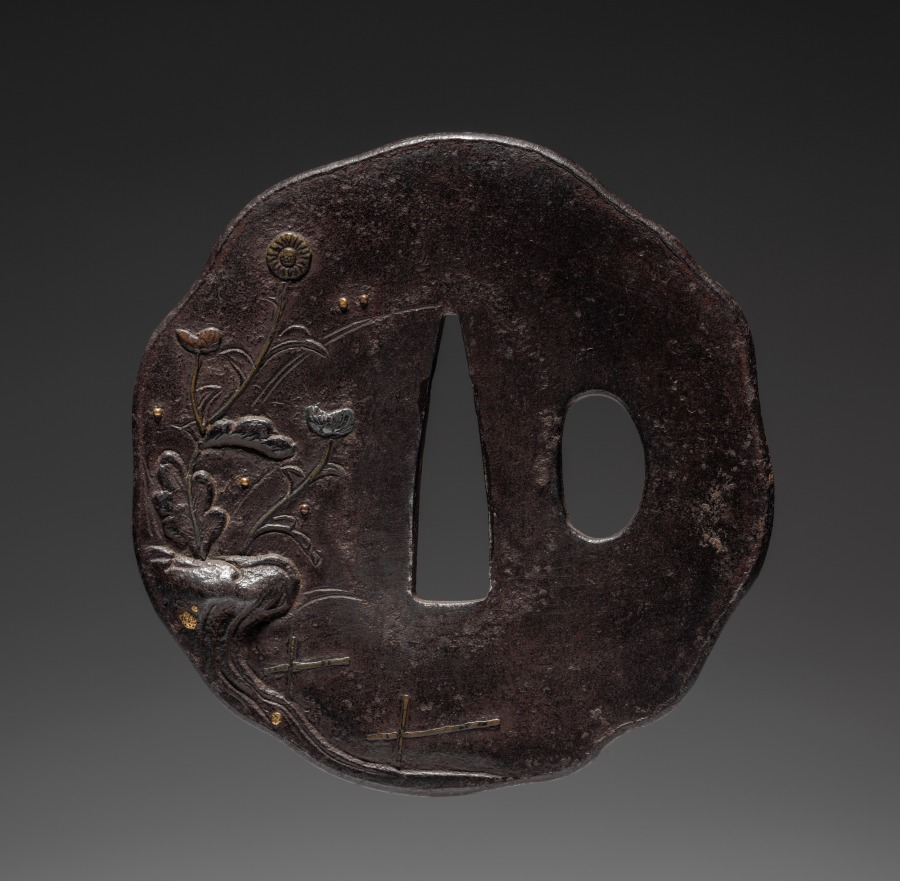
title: Sword Guard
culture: Japan, Edo period (1615–1868)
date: mid-1700s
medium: iron (Umetada type)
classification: Arms and Armor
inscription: signed "Umetada."